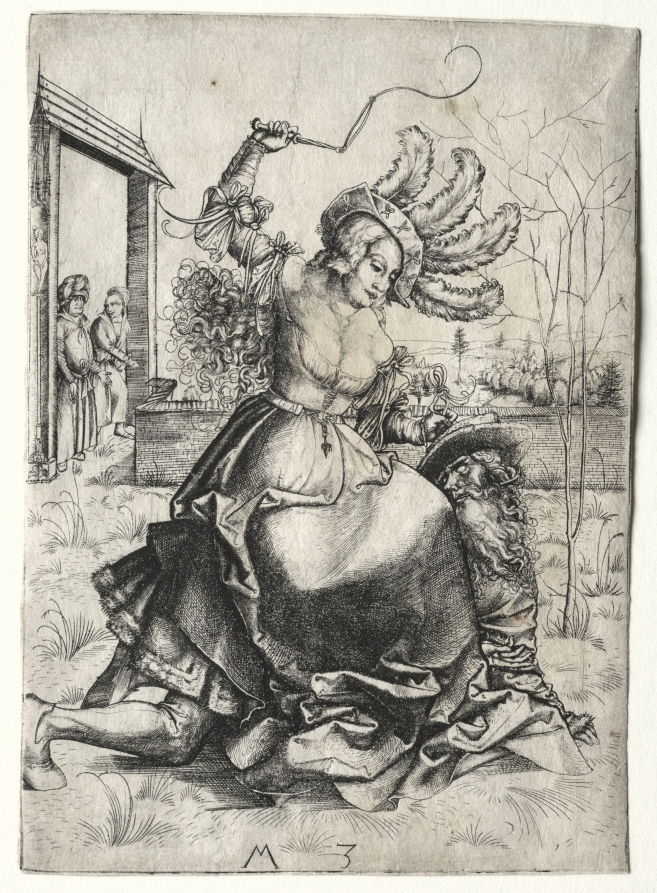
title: Aristotle and Philis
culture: Germany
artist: Master MZ (German)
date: 1500–03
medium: engraving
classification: Print